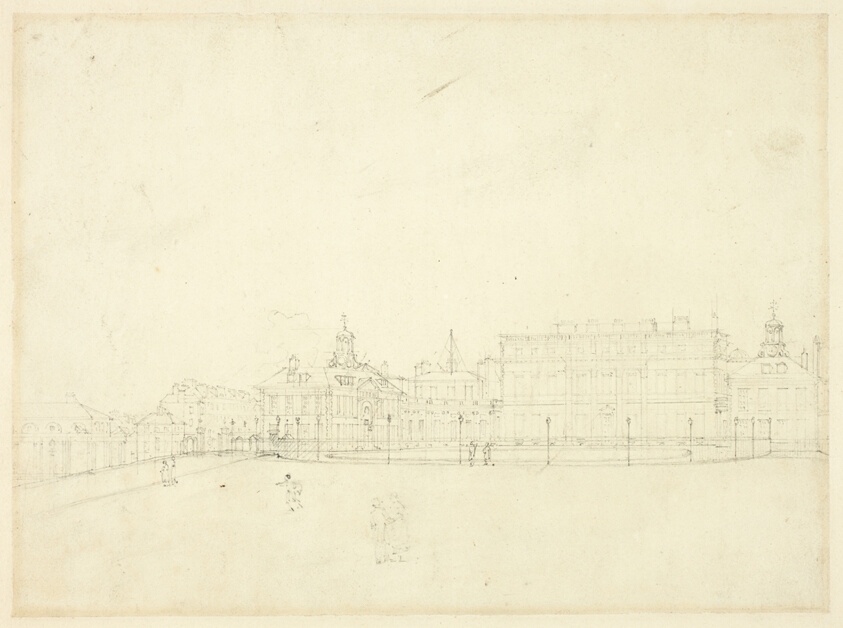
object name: Drawing and Watercolor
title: Study for Queen's Palace, St. James Park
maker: Augustus Charles Pugin (English, born France, 1762-1832); Thomas Rowlandson (English, 1756-1827)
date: c. 1809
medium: Graphite on ivory wove paper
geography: England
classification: graphite; drawings (visual works); prints and drawing